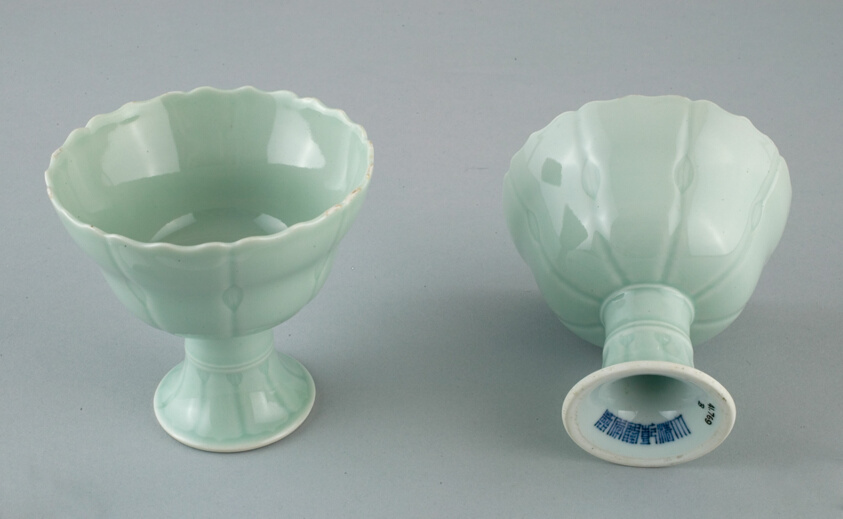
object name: Vessel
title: Lotus Stemcup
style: Chinese (culture or style)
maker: China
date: Qing dynasty (1644–1911), Qianlong reign mark and period (1736–1795)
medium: Glazed porcelain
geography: China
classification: bowl; porcelain; dish (vessel); asian art; ceramics; vessel